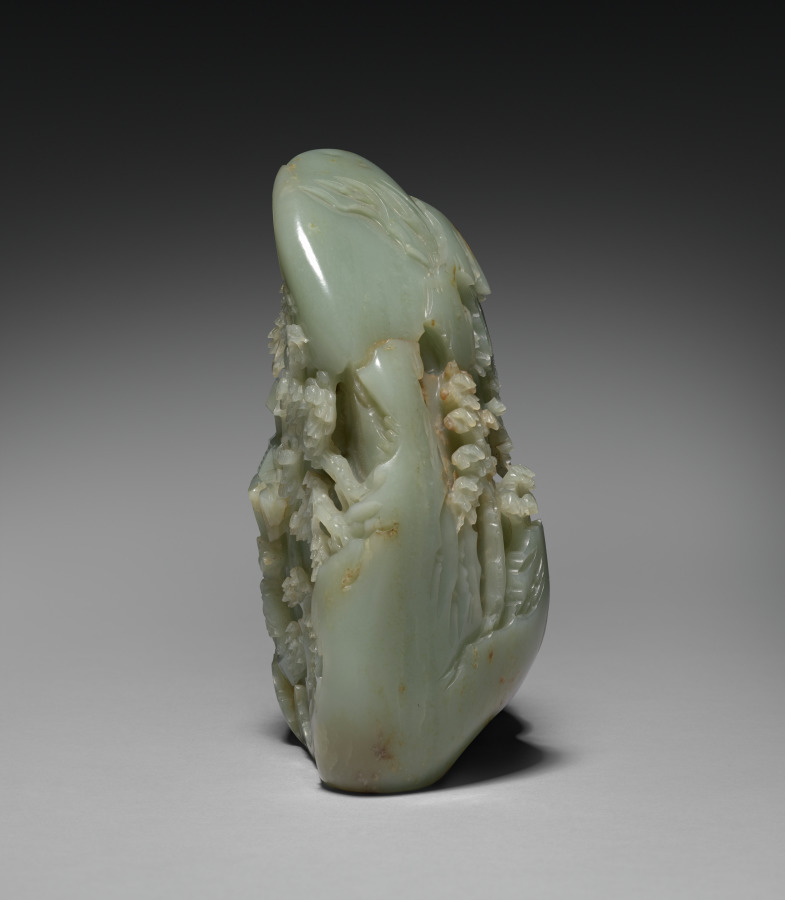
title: Miniature Mountain with Daoist Paradise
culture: China, Qing dynasty (1644–1911), Qianlong reign (1736–95)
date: 1736–95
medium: green jade with brown markings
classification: Jade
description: Sizable jade boulders of mountainous landscapes were carved to represent the search for the paradise or immortals' dwellings in the mountains. This Daoist theme has fired the Chinese imagination throughout history. Believed to have spiritual and magical properties, jade has long been used in tombs and intended for preserving the corporeal body and the soul in the quest for eternity. It is recorded that Daoist practitioners drank morning dews with scraps of jade as an elixir of immortality.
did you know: The bearded immortal is accompanied by a servant carrying a cluster of peaches, symbols of immortality.